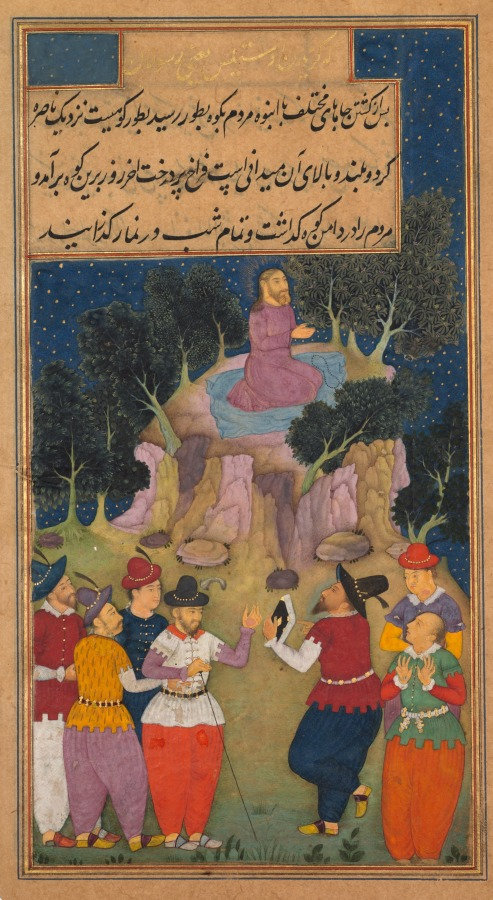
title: Jesus on Mount Tabor, near Nazareth where he Chooses Twelve of his Followers and Calls them Apostles (folio 87 verso), from a Mirror of Holiness (Mir’at al-quds) of Father Jerome Xavier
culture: Mughal India, Allahabad, made for Prince Salim (1569–1627)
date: 1602–04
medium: Gum tempera, ink, color, and gold on paper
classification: Manuscript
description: When Jesus arrived at Mount Tabor, he left his followers at the foot of the hill and spent the entire night in prayer. This is the only night scene in the manuscript, and the artist has used glowing colors and gold paint to dot the night sky with stars. Seven of the 12 apostles mill around the foreground; some converse with animated gestures, possibly debating the contents of a text. At dawn Jesus will have summoned the 12, named them his apostles and given them the power to drive out unclean spirits and heal the sick and infirm.